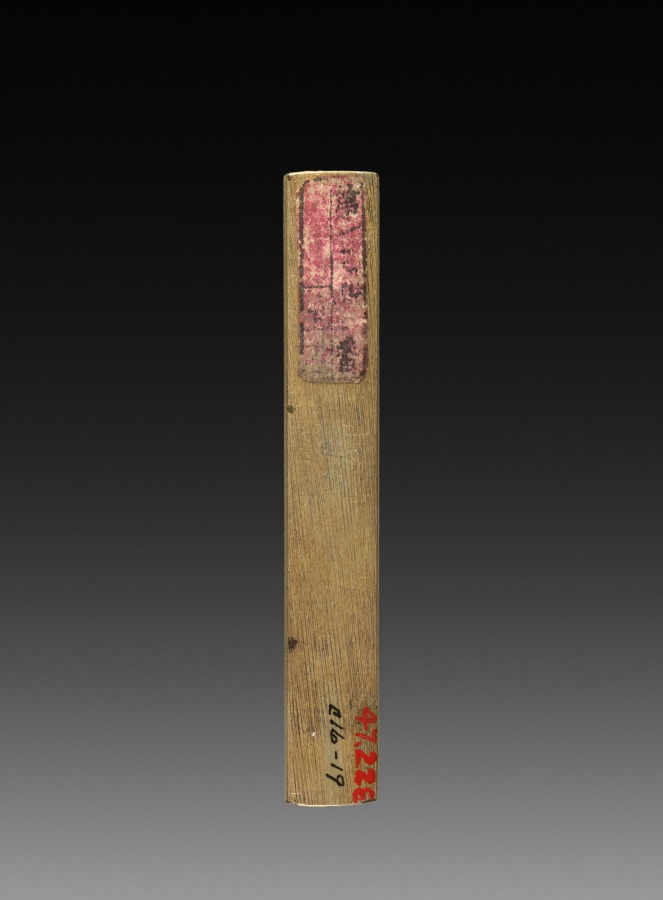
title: Knife Handle (Kozuka)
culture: Japan, Edo period (1615–1868)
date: early to mid-1800s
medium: inlaid bronze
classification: Metalwork